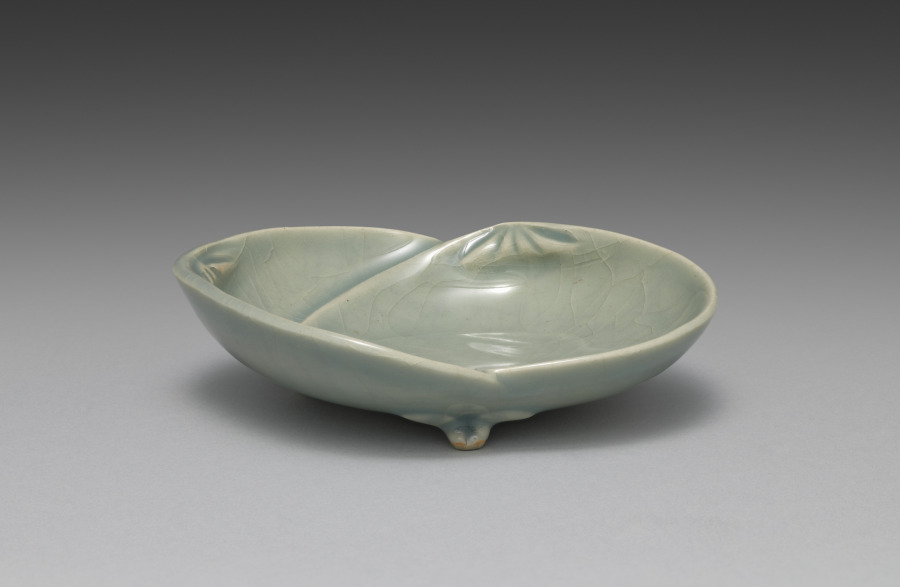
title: Dish from Saucers with Matching Shells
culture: Japan, Meiji period (1868–1912)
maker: Seifū Yohei III (Japanese, 1851–1914)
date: 1893–1914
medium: Porcelain with molded design and green crackled glaze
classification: Ceramic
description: Yohei III’s main output for his sophisticated clientele was in the form of tea sets and dining sets. He created a range of dishes in green glazes. He often produced in pairs, sets of five, or sets of ten. The set of five dishes with a more complex form is described as having a “water-colored glaze” (mizuiroyū). These are shaped like clam half shells, a reference to a game in which shell halves painted with narrative scenes or a variety of motifs must be matched back together by the players. The dishes have molded details to articulate the shell forms, and the crackling across each shell adds another dimension to the surface. Each dish is set on three small feet, formed by a pinched piece of clay and attached to an unglazed area on the underside of the dish. Curiously, while four of the dishes are stamped with the artist’s mark, one has instead a signature carved into the base.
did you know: Each of the paired-shell dishes has its own compartment in a long, flat box.